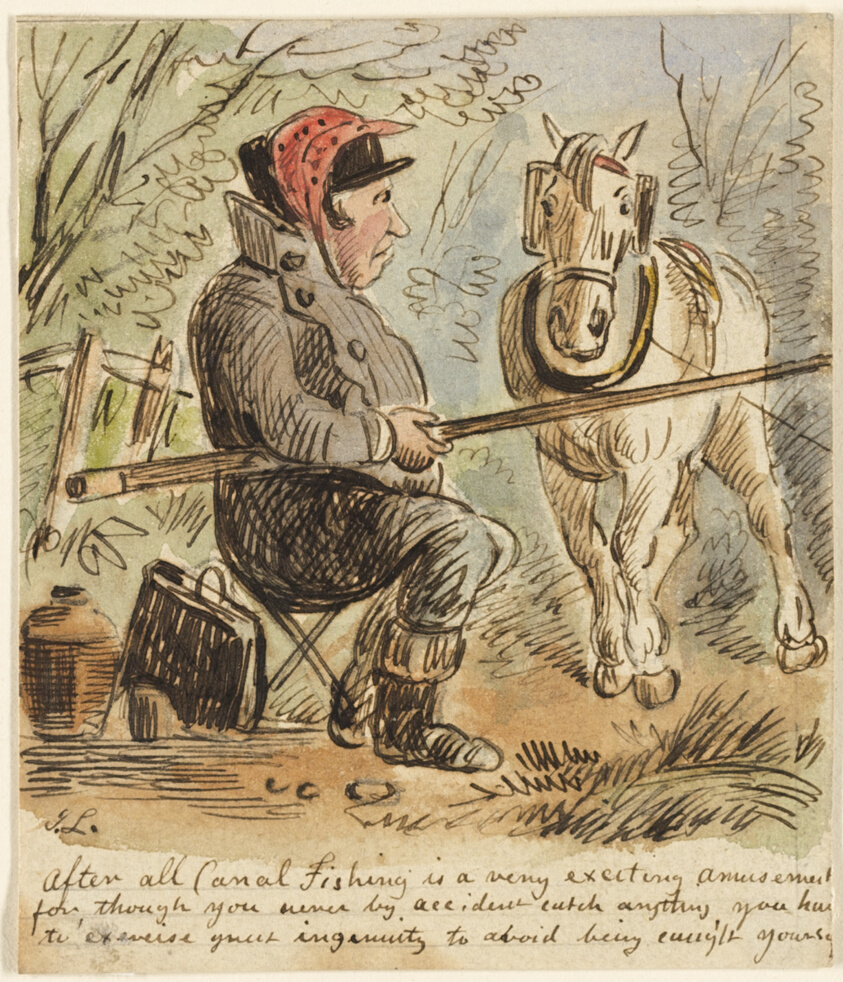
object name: Drawing and Watercolor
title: Canal Fishing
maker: John Leech (English, 1817-1864)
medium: Watercolor and pen and brown ink, over graphite, on cream wove paper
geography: England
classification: watercolor; drawings (visual works); prints and drawing